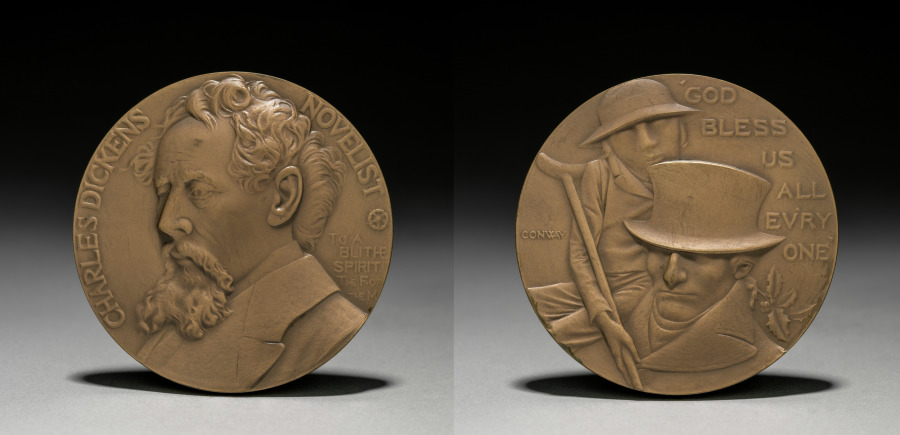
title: Medal: Charles Dickens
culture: America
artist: John Severinus Conway (American, 1852–1925)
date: 1912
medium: bronze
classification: Metalwork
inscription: "CHARLES DICKENS NOVELIST. TO A/BLITHE/SPIRIT/THE F OF/ THE M."